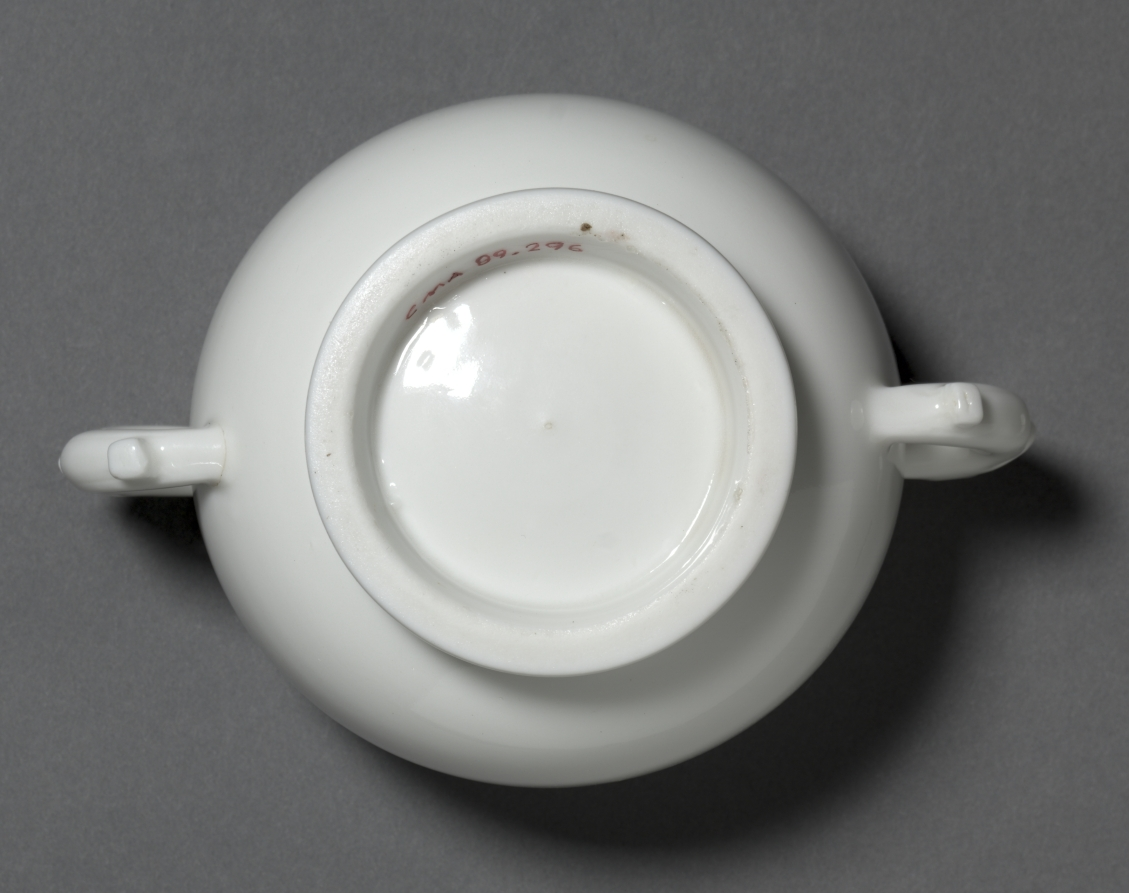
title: Incense Burner in the form of an archaic bronze vessel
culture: Chinese, Fujian province, Dehua, Ming dynasty (1368-1644)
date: 1600s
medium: Glazed white porcelain, Dehua ware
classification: Ceramic